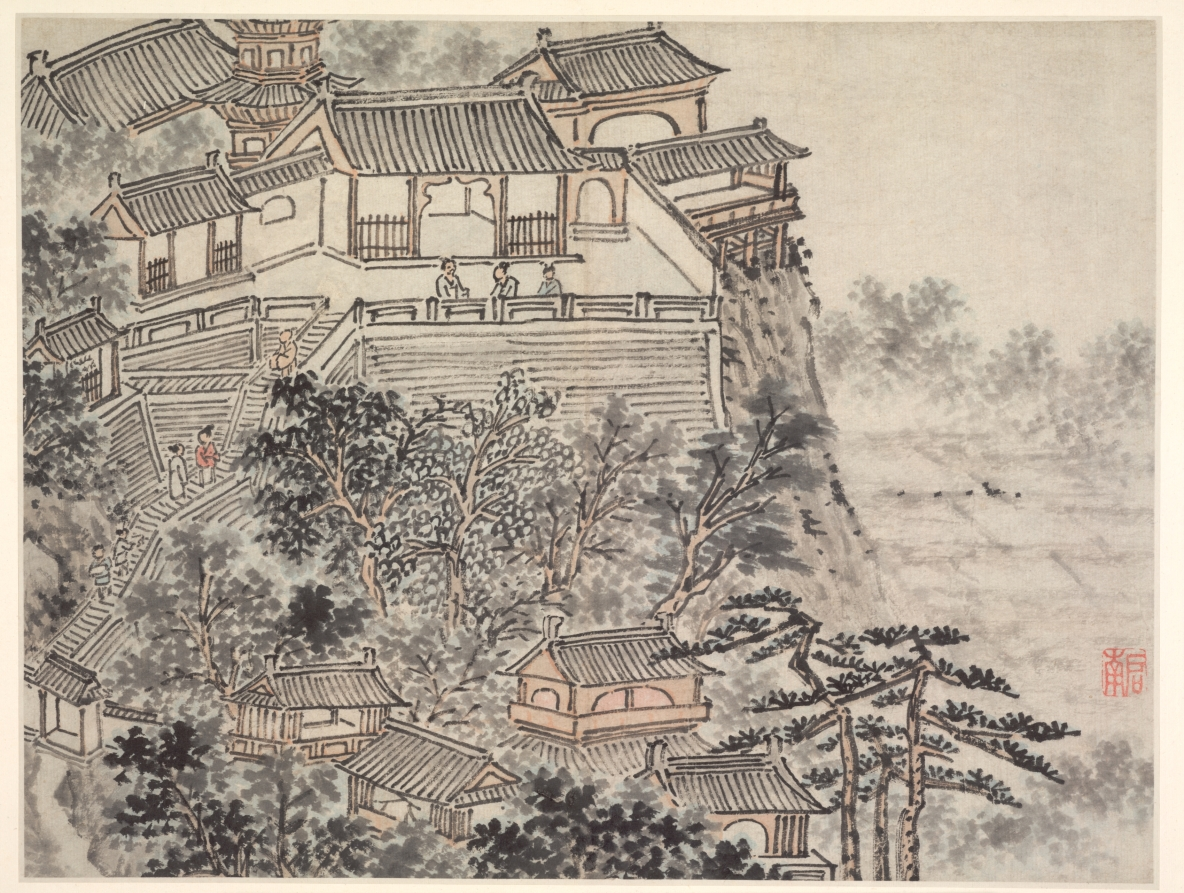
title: The Five Sages Terrace, from Twelve Views of Tiger Hill, Suzhou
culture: China, Ming dynasty (1368–1644)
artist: Shen Zhou (Chinese, 1427–1509)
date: after 1490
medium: Album leaf; ink on paper or ink and slight color on paper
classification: Painting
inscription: [印] 启南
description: Views of Tiger Hill depicts a historic site a few miles northwest of Suzhou. The scenes simulate a visit from arriving by boat at the foot of the mountain to climbing to Cloudy Cliff Monastery. Representations of the artist’s mature style, Shen Zhou included views in subtle colors in the suite of monochrome scenes. A Suzhou native, Shen Zhou was supported by family wealth and rejected an official career in favor of life as a retired scholar. Turning to painting in midlife, he is regarded as the founder of the Wu School of painting, with its center in Suzhou.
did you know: The Five Sage Terrace marks the top of Tiger Hill.